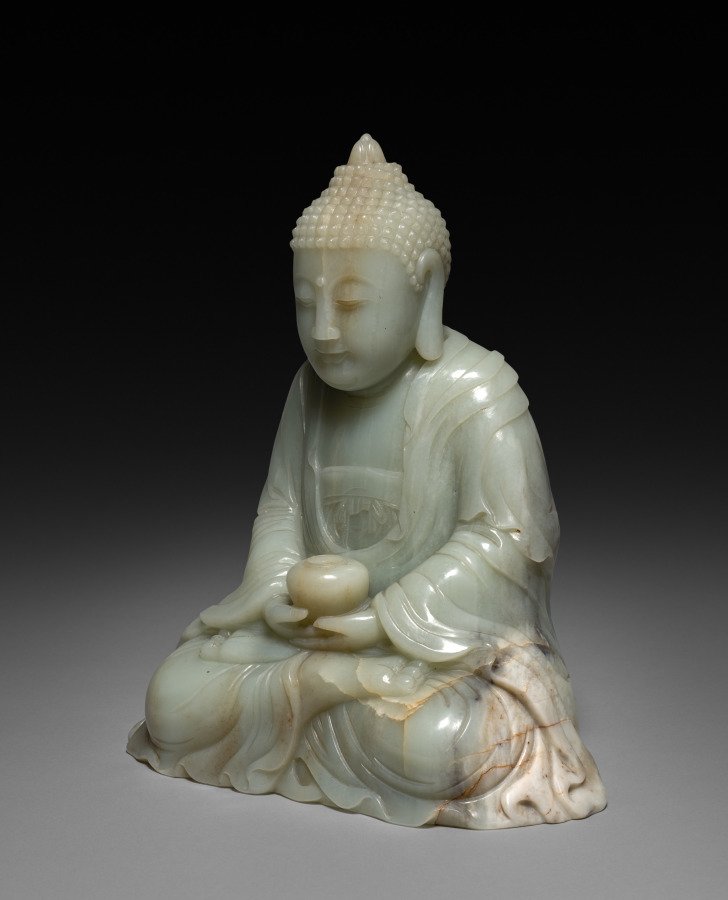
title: Seated Buddha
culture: China, Qing dynasty (1644-1911)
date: 1700s–1800s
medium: jade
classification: Jade